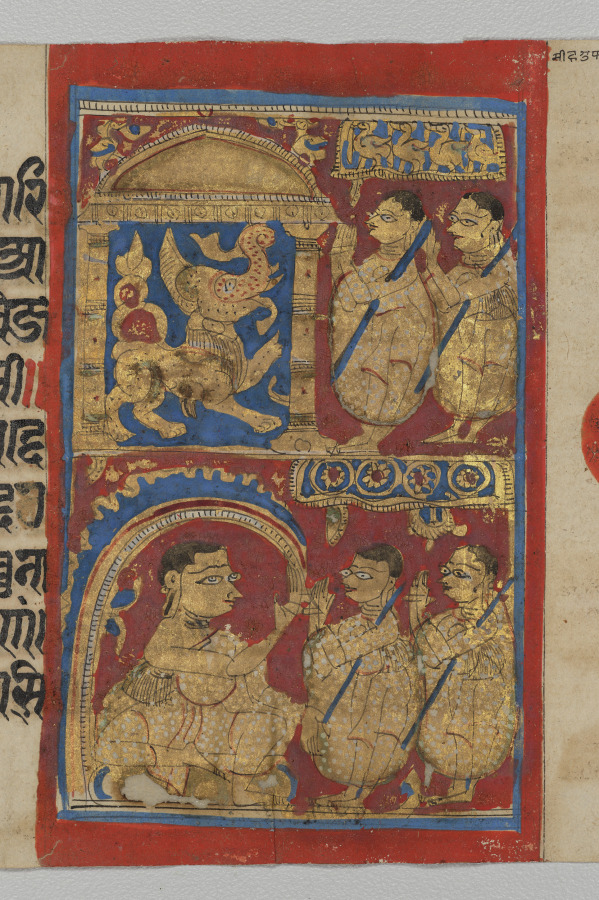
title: The Lion's Cave with Sthulabhadra and His Sisters, Folio 60 (verso), from a Kalpa-sutra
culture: Western India, Gujarat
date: c. 1450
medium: Gum tempera, ink, and gold on paper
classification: Painting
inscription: [[beginning with line 1]] ttehiṁto | ittha ṇaṁ godāse nāmaṁ gaṇe niggae | tassa ṇaṁ imāu cattāri [line 2] sāhāu | evam=āhijjaṁti || taṁ jahā Tāmalittiā | Koḍīvarisiā [line 3] Poṁḍavaddhaṇiā | Dāsīkhabbaḍiā | therassa| |ṇaṁ ajja-Saṁbhūivija- [line 4] yassa | māḍhara-saguttassa | ime ḍuvālasa therā | aṁtevāsī || [line 5] ahāvaccā abhinnāyā hutthā || taṁ jahā | Naṁdaṇabhadde [line 6] Uvanaṁde [note 1] | taha Tīsabhadda Jasabhadde | there a Sumiṇabhadde 7? [line 7] Gaṇibhadde Punnabhadde a || 1 there a Thūlabhadde | Ujjumaī [note 2] Jaṁbu nā- [line 8] madhijje a | there a Dīhabhadde | there taha Paṁḍubhadde a || 2 therassa ṇaṁ | [line 9] ajja-Saṁbhūivijayassa | māḍhara-saguttassa | imāu satta aṁtevāsi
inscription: [[upper right]] sīha guphā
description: This manuscript is open to a page with a painting that depicts the story of a Jain monk who transformed himself into a composite beast when his sisters, two nuns, came to visit him. Terrified, the nuns ran to a senior monk, at the lower left, who admonished their brother for his overly prideful display of power. Remarkably, this story is not told in the text itself, which contains only their names among a list of prominent Jain teachers. The painting would remind a reader of the story that is found in many commentaries to the text.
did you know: The three red dots in the margins and the center occur only on the reverse side of the page; the obverse side has only one red dot in the center.